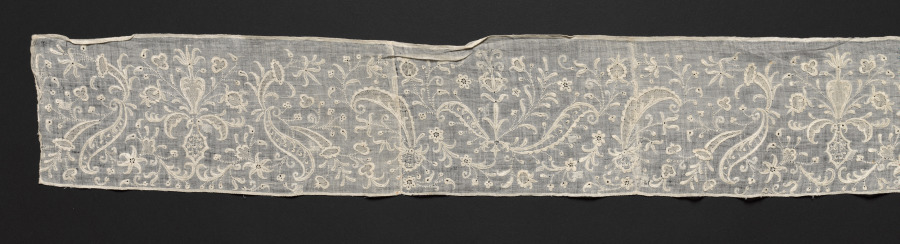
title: Band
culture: France(?)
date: 1700s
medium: Plain weave linen: needle lace (drawnwork) and embroidery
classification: Embroidery